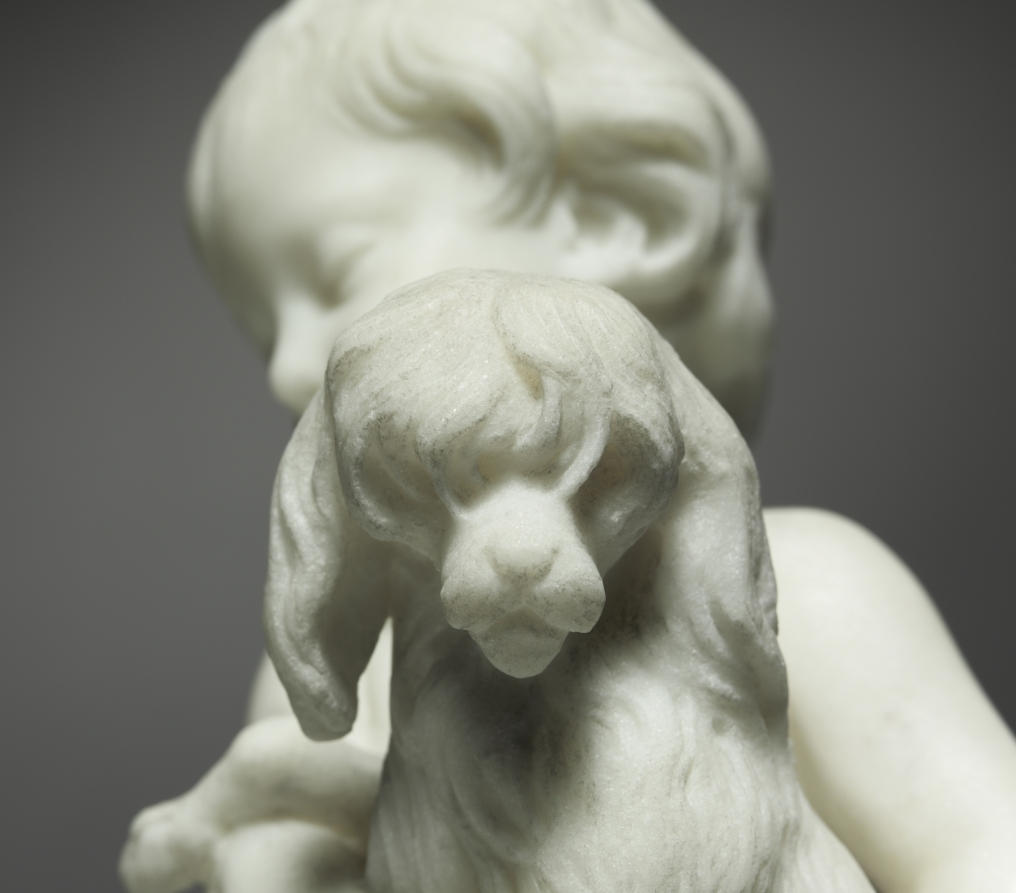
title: Faithful Love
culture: France, 19th century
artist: after Augustin Pajou (French, 1730–1809)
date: 1800s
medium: marble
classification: Sculpture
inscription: signature behind stump with roses: Pajou f(ecit) 1787.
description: These statuettes represent the opposing spectrums of love—fickle and faithful—both portrayed by Cupid. Fickle Love absent-mindedly plays with a butterfly, a symbol of the fleeting moment. Conversely, Faithful Love is accompanied by a dog, the ultimate loyal companion. These works were originally believed to be by the hand of Augustin Pajou, because the works are signed and he made nearly identical sculptures. However, due to the slightly clumsy execution and the awkward scale of the signatures, the museum now believes the statuettes were created by another artist after Pajou's design.